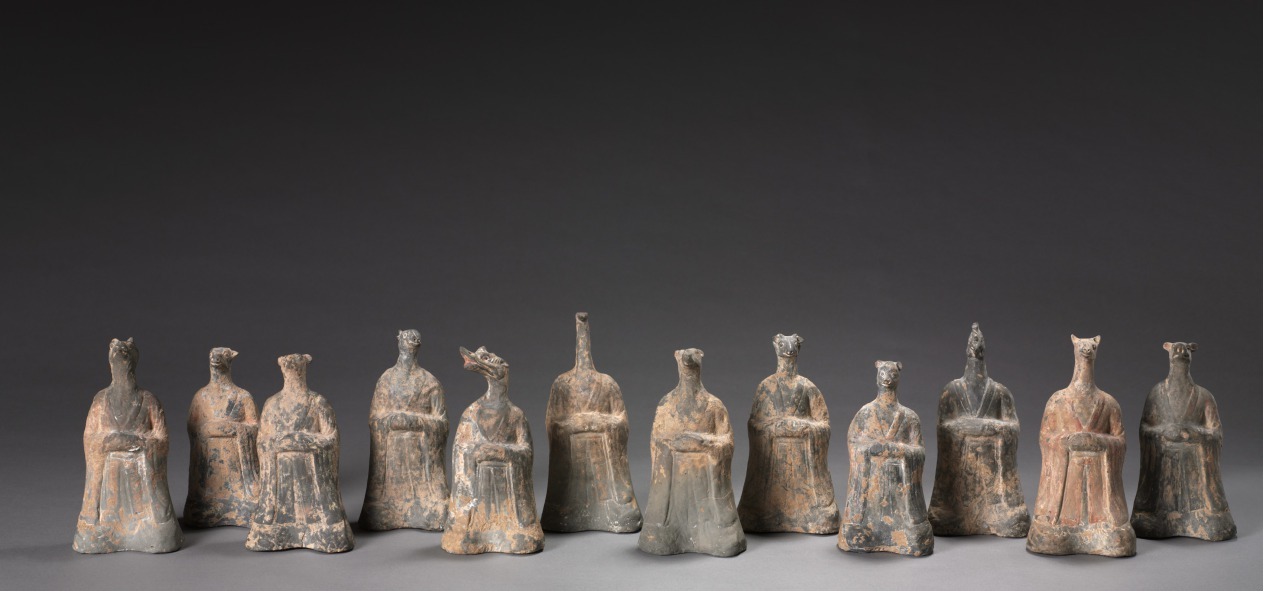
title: Mortuary Figures of the Zodiac Signs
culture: China, Northern Wei dynasty (386–534 CE)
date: 500s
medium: gray earthenware with traces of slip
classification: Sculpture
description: The twelve-animal zodiac series—rat, ox, tiger, rabbit, dragon, snake, horse, goat, monkey, rooster, dog, and boar—signifies a traditional Chinese concept of time structured in a cyclical order. The twelve animals are also linked to the art of fortune-telling that underlies human existence in connection with the changes of the universe. The use of the twelve zodiac animals as tomb furniture suggests they provided a cosmological structure for the afterlife.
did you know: These earthenware mortuary figures appear to have been made in molds.